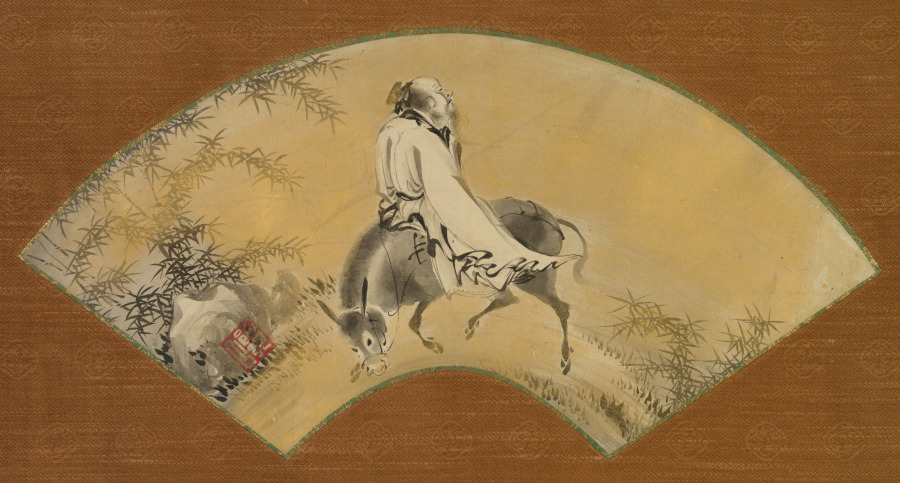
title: Pan Lang (Han Rō)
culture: Japan, Muromachi period (1392–1573)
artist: Shikibu Terutada (Japanese, active mid-1500s)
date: mid-1500s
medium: Fan-shaped painting mounted as hanging scroll; ink and gold on paper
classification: Painting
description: These three fan-shaped paintings, now mounted as individual hanging scrolls, were once part of a set of 20 mounted on a folding screen. They portray the Chinese subjects, from left to right, of the scholar-official Pan Lang, Hanshan reciting his poetry to Shide, and a duck in flight above reeds. Pan Lang grew so fond of the mountain in his place of exile that when he was ordered back to the capital, he rode backward on his donkey so he could see it until it receded into the distance. Hanshan and Shide worked in the kitchen of a Zen monastery, but were actually reincarnations of the bodhisattvas Manjushri and Samantabhadra. The combination of a mandarin duck and reeds may have signified a level of attainment in Chinese civil service exams. All three paintings bear the seal of the Kantobased artist Shikibu Terutada. Shikibu was familiar with Kano school painting, but he also modeled his early style after that of the prominent Kanto-based Kenkō Shōkei (active about 1470–after 1523).